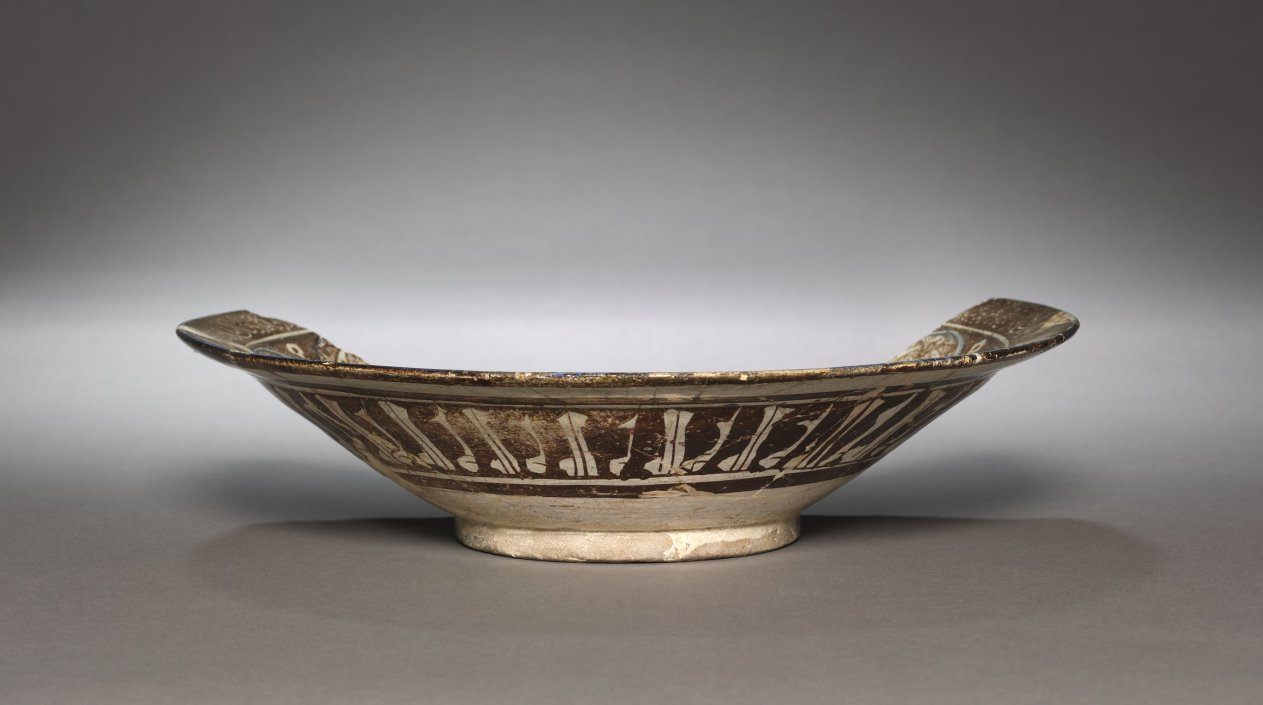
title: Plate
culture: Seljuk Iran, Rayy, or Syria, Raqqa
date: 1200s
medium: fritware with luster-painted design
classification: Ceramic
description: Fritware Where fine clay was unavailable, potters made a paste out of ground quartz, clay, and glass. When fired, the paste created a compact white material called fritware that approximated the appearance of porcelain.